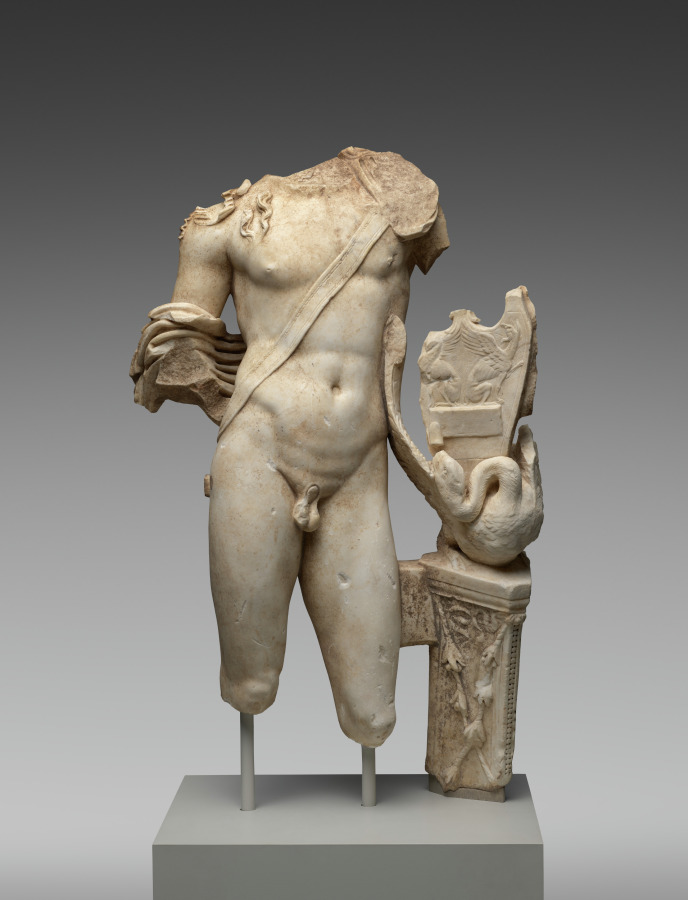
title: Torso of Apollo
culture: Italy, Roman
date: c. 100–200 CE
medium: marble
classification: Sculpture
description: This ancient statue depicts the Greek god Apollo, identified by his youthful body and the fragmentary remains of his kithara, a type of lyre (or stringed instrument) used by poets and musicians in ancient Greece. Both the kithara, decorated with griffins, and the swan upon which it rests (atop a triangular column), signify Apollo’s roles as the god of music and leader of the Muses. Beloved by the Muses for their song, swans were considered sacred to Apollo because he gave them the gift of prophecy. Swans sing a glorious song before they die, knowing they will soon return to Apollo to be reborn.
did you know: Apollo received his lyre from Hermes, who invented it.